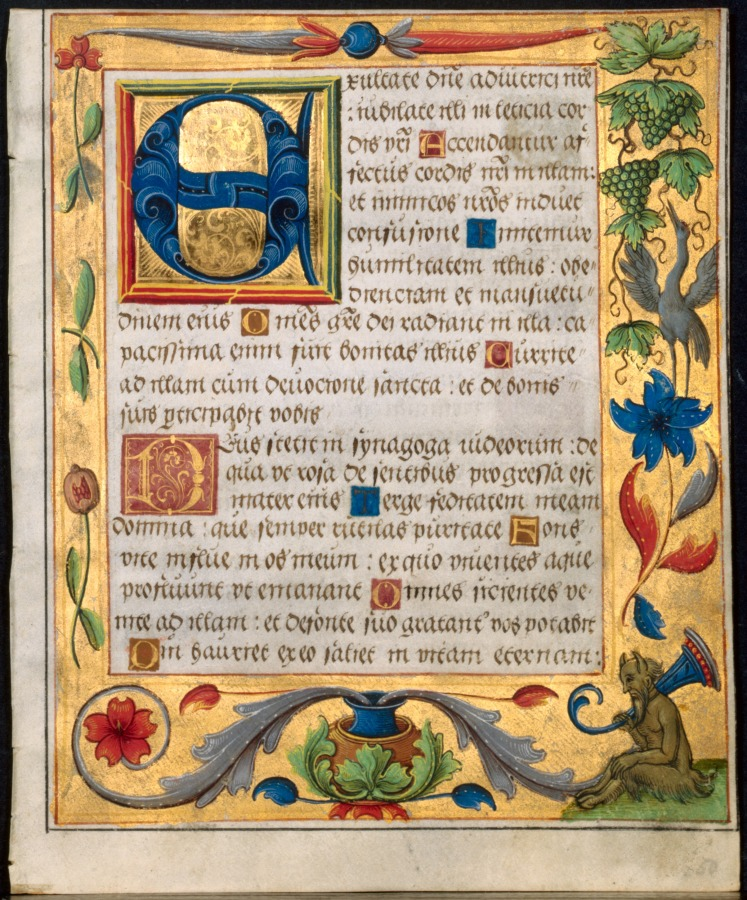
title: Leaf from a Psalter and Prayerbook: Initial E with Ornamental Border Containing a Seated Satyr and a Bird Eating Grapes (recto) and Ornamental Border with Flowers and Squirrel (verso) (2 of 3 Excised Leaves)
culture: North Germany, Hildesheim (?), 16th century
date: c. 1524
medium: ink, tempera and liquid gold on vellum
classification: Manuscript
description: This leaf reveals the charm of secular decoration such as satyrs or domestic activities like cooking. Such details would have been a sumptuous delight to the original owner. The original book was a highly personalized volume apparently written and illuminated in North Germany as suggested by internal textual references. The prominent inclusion of Saint Godehard (died 1038), Bishop of Hildesheim, in the calendar (not visible) would suggest that the manuscript was produced in that city.